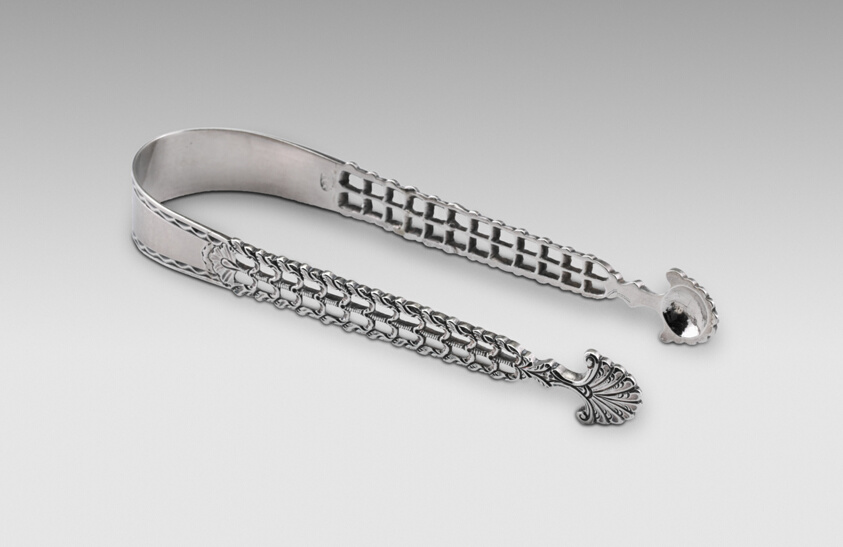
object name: Metalwork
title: Tea Tongs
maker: John D. Germon; American, active 1782–1825; Philadelphia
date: 1785–1800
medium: Silver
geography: Philadelphia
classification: utensil; silver; american decorative arts; american arts; decorative arts